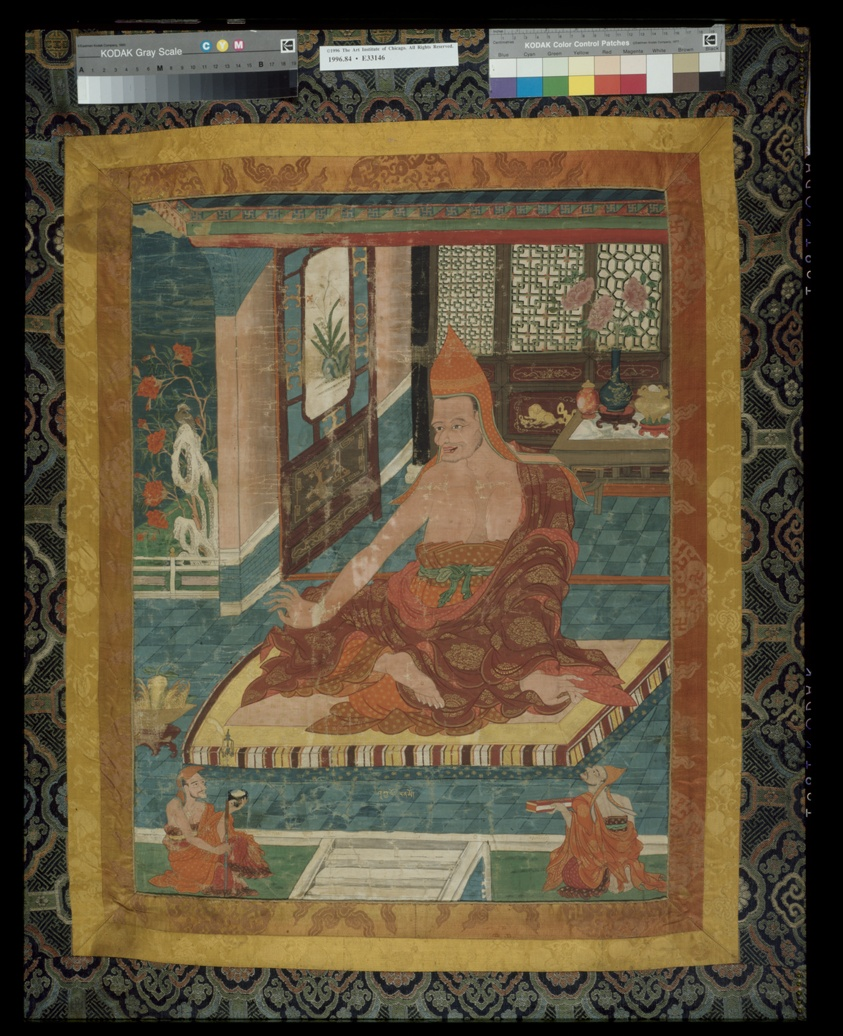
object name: Painting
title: Painted Banner (Thangka) of Portrait of Sakya Pandita (1132 - 1251)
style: Himalayan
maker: Eastern Tibet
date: c. 1800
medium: Pigment on cloth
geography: Tibet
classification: painting; asian art